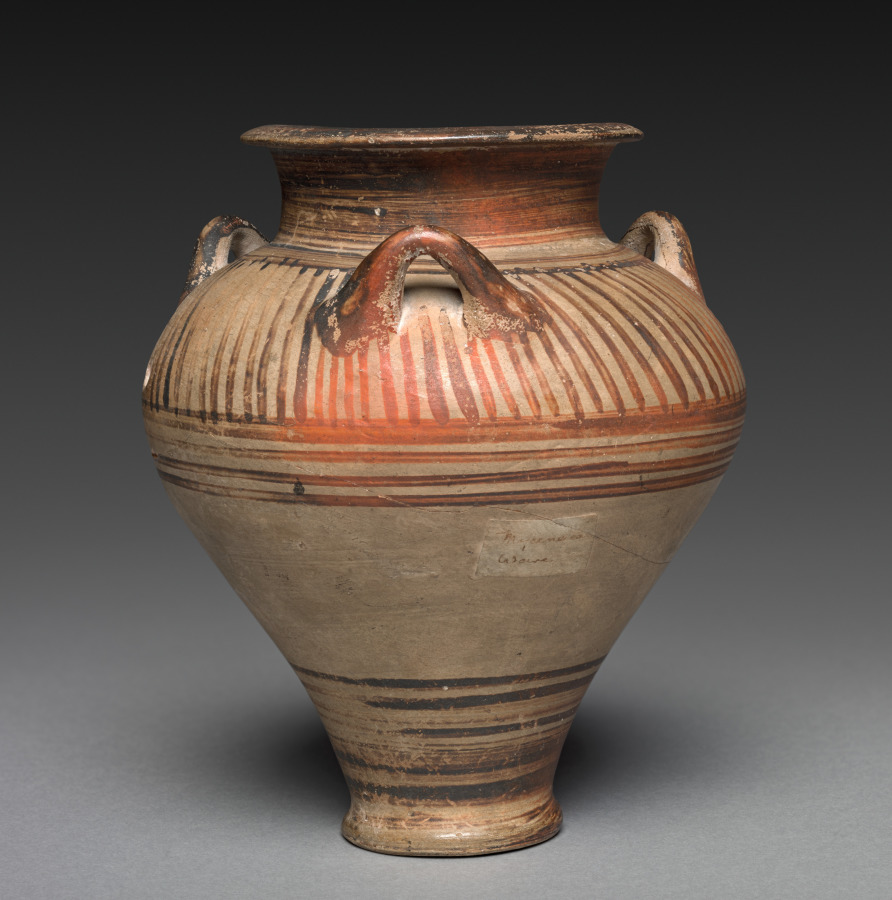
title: Three Handled Jar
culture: Cyprus, late Helladic III A1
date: c. 3200–c. 1050 BCE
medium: ceramic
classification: Ceramic